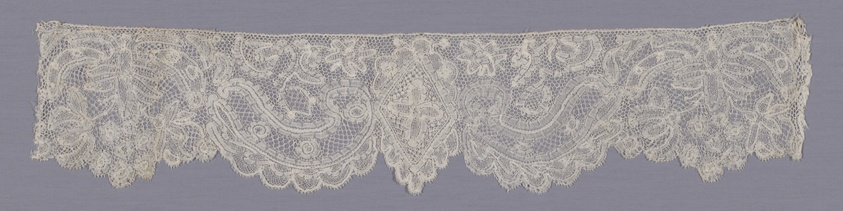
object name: Costume and Accessories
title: Border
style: 18th Century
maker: Belgium, Flanders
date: 1720/40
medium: Linen, bobbin part lace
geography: Flanders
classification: lace - bobbin; costume; costume accessory; costume - lace; lace; textile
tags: diamond shapes, cartouches, arabesque